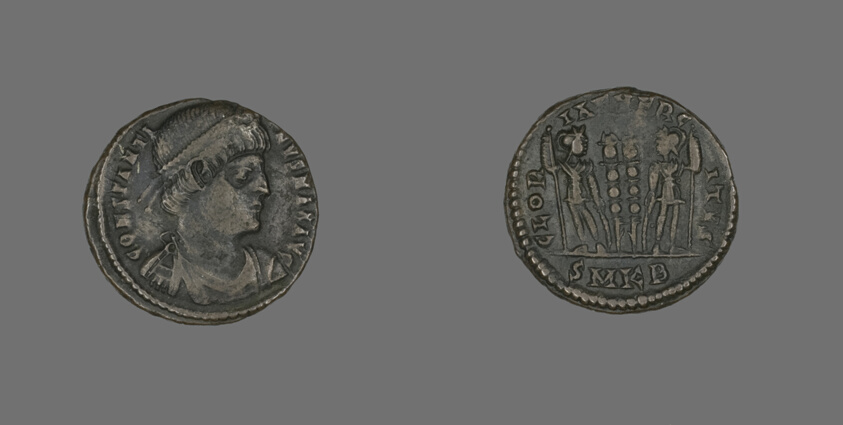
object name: Coin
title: Coin Portraying Emperor Constantine I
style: roman (ancient, style or period), ancient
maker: Roman, minted in Cyzicus, Asia Minor (now Turkey)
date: 331-334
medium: Bronze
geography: Roman Empire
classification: coin; ancient art